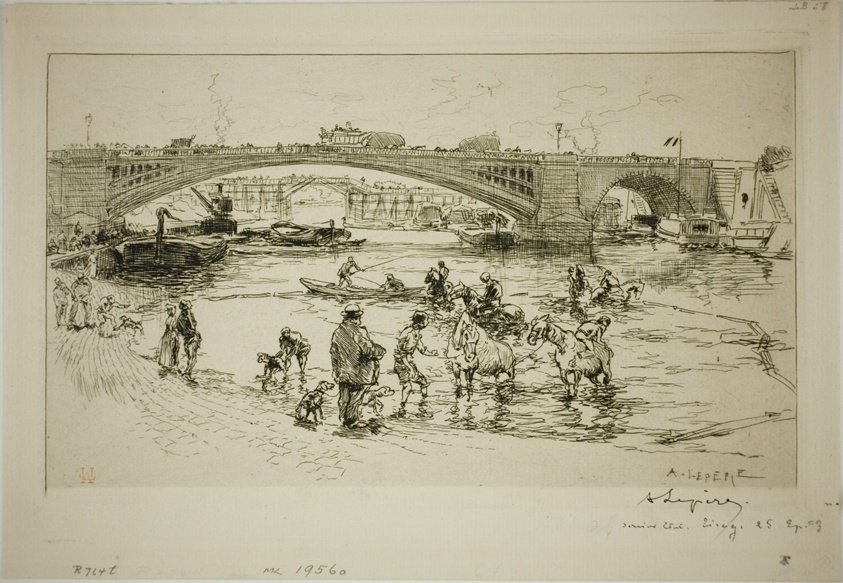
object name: Print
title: At the Pont Sully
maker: Louis Auguste Lepère (French, 1849-1918)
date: 1892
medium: Etching with aquatint and drypoint on cream laid paper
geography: France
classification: etching; print; prints and drawing